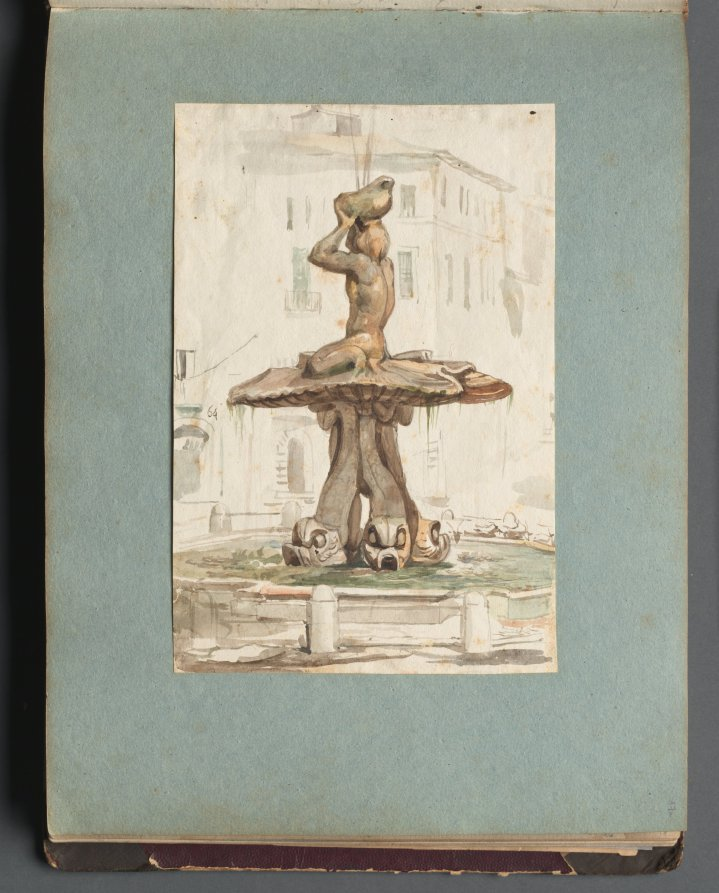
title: Album with Views of Rome and Surroundings, Landscape Studies, page 17a: Roman Fountian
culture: Germany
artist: Franz Johann Heinrich Nadorp (German, 1794–1876)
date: c. 1830s-70s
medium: watercolor on white paper laid down on blue paper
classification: Bound Volume